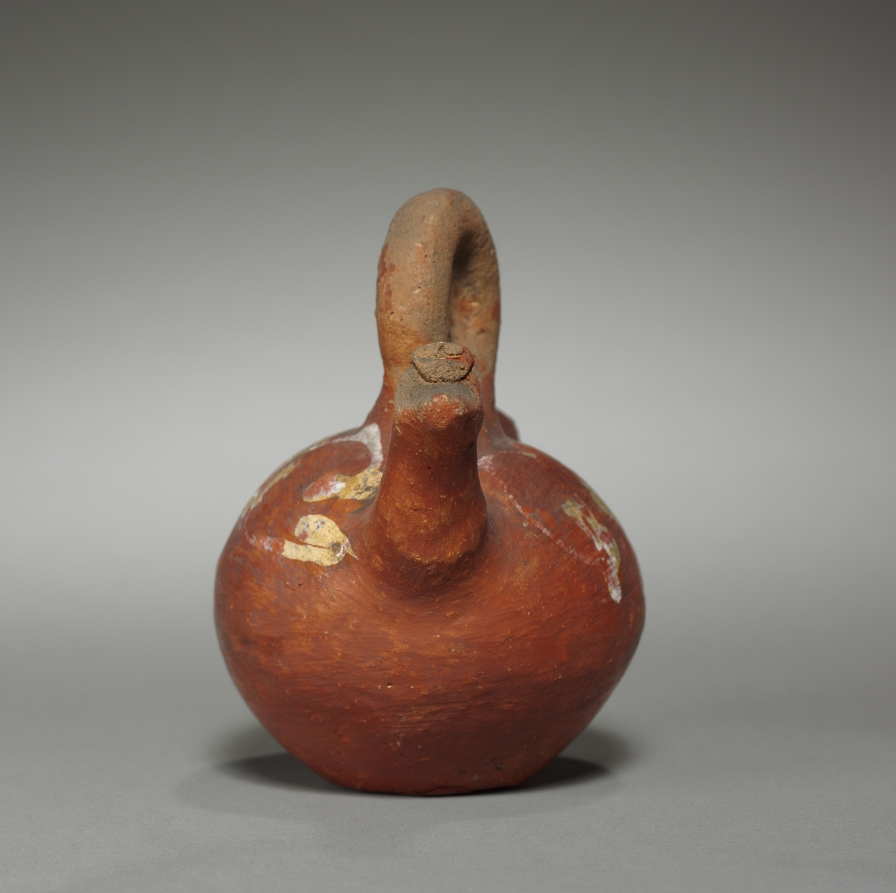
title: Bottle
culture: Peru, 20th century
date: 1900–1920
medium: pottery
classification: Ceramic